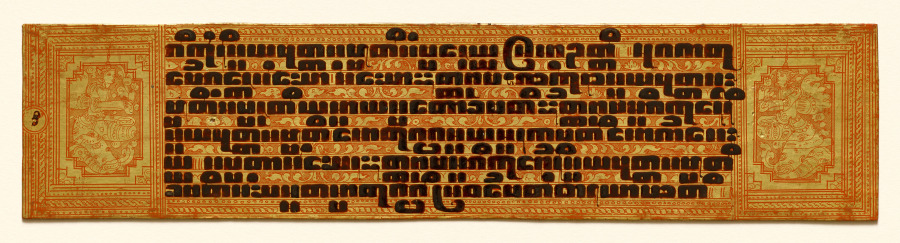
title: Text and illumination, folio 16 (verso) from a Kammavacha: Buddhist ordination text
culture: Myanmar (Burma)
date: 1800s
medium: Leaf: lacquer and gilding on cloth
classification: Manuscript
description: In premodern Burma, lay people commissioned lavishly ornamented manuscripts for ceremonial occasions, when officiants would read aloud from the text. Written in black lacquer, the text is in the language of Pali written in a Burmese script. It contains ordination rites and procedures for monastic ceremonies. The second to last page is covered with intricately drawn, winged celestial beings (nats) in gestures of praise. They fly amid intertwining vegetation—denoting bounty—that grows from serpentine forms that refer to rain clouds. Lionlike forms inhabit the space with them. The top and bottom covers are equally ornamented with jeweled floral patterning.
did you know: The Pali text of this manuscript is written in Burmese square script, which is also known as "tamarind seed script."